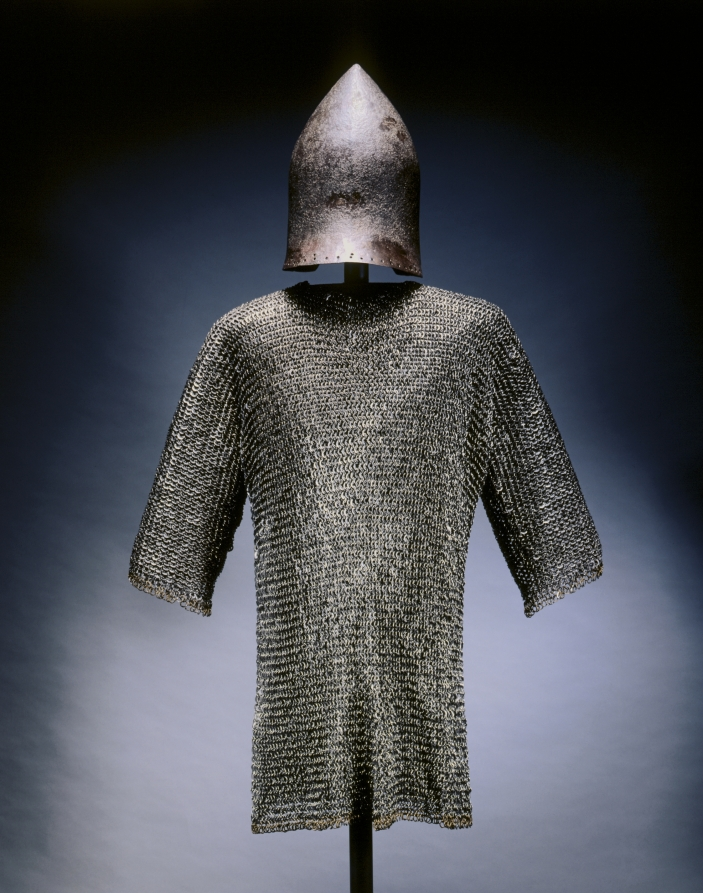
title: Hauberk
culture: Germany (?)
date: c. 1400–1450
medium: steel and brass rings, riveted with modern buckles and straps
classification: Arms and Armor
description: Mail armor was the predominant form of metal body defense for European knights until about 1350. The term derives from the Old French word maille (mesh), implying a protective textile. Each mail garment was constructed of small linked metal rings and "woven" for a specific part of the body. Mail for the torso is a hauberk and typically reached mid-thigh.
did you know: Mail was expensive to make and generally only available to warriors of noble birth unless it could be obtained as war booty.